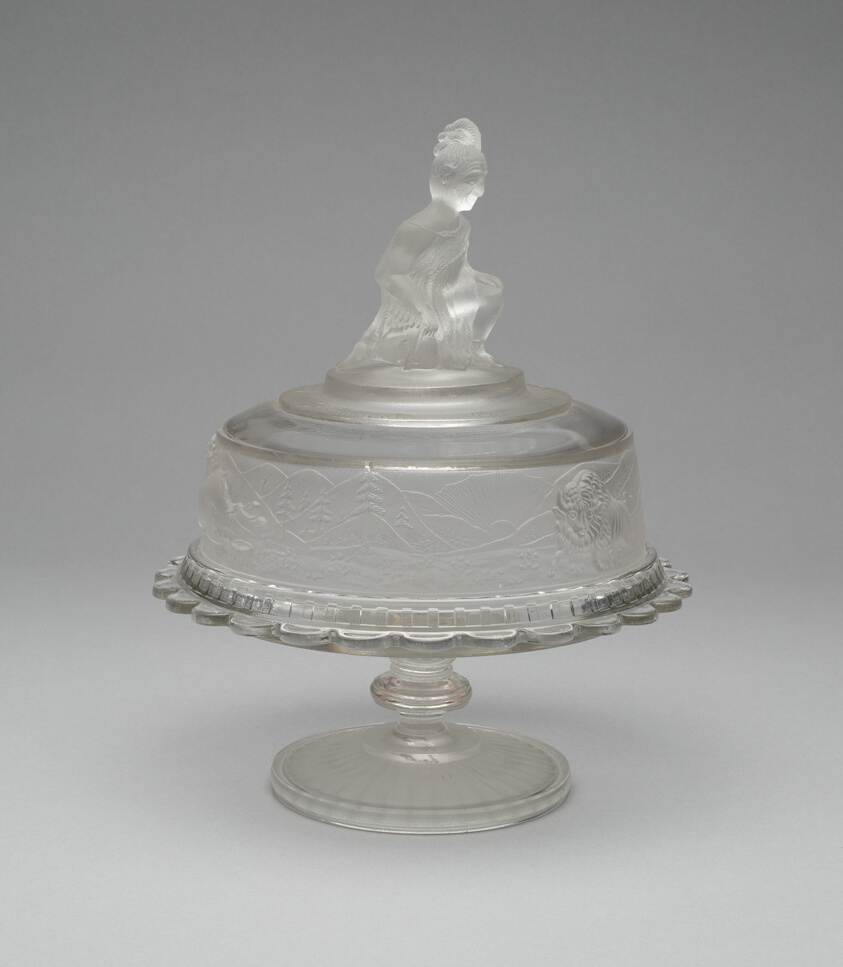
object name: Glass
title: "Westward Ho!/Pioneer" pattern covered butter dish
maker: Gillinder and Sons, 1861–c. 1930; Philadelphia or Greenbsburg, Pennsylvania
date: c. 1876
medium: Glass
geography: Philadelphia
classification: vessel for serving food; glass; dish (vessel); american decorative arts; american arts; decorative arts